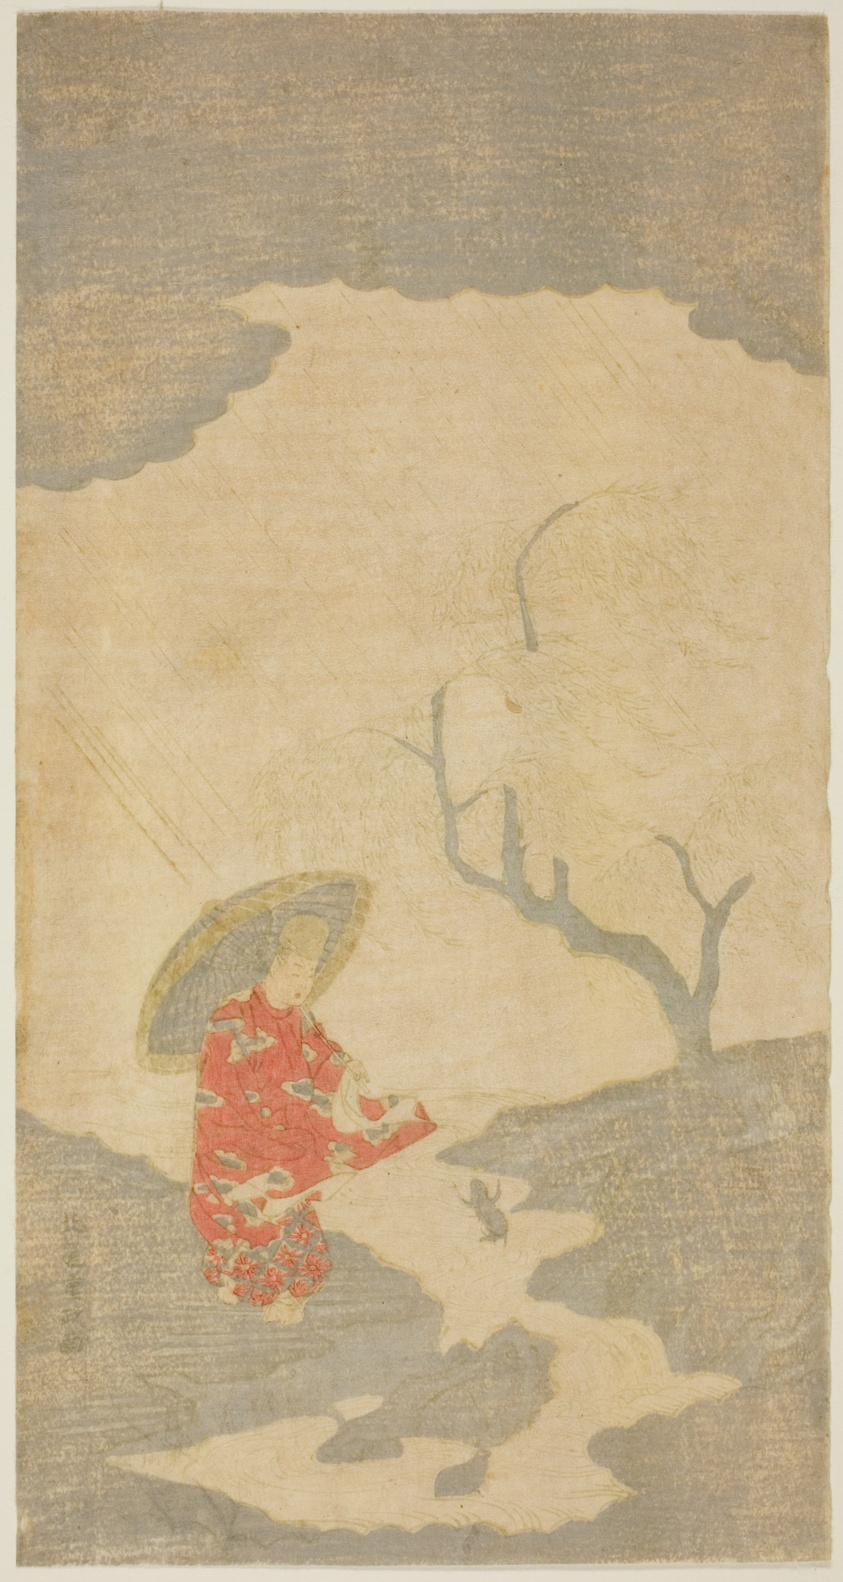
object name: Print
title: Ono no Tofu Watching a Leaping Frog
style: Japanese (culture or style)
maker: Kitao Shigemasa (Japanese, 1739-1820)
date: early 1760s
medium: Color woodblock print; hosoban, mizu-e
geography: Japan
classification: woodblock print; print; asian art